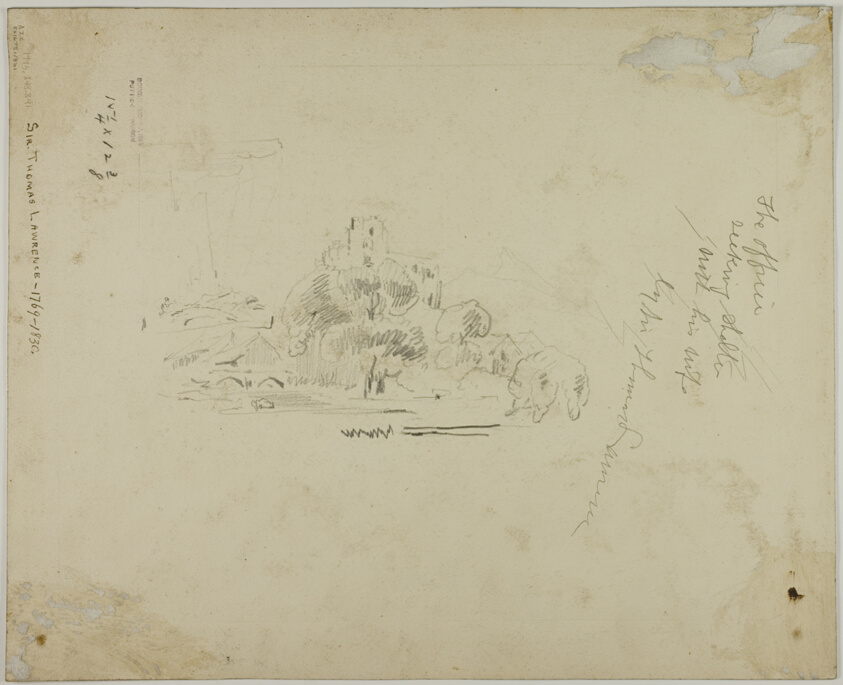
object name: Drawing and Watercolor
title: Officer Seeking Shelter with his Wife and Children from a Storm (recto); Sketch of Castle on Hill (verso)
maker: After Richard Westall; English, 1765-1836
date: c. 1800/20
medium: Pen and brown ink with brush and brown wash and watercolor, scraped to create highlights, heightened with gum varnish (recto), and graphite (verso), on cream wove card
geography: England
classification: watercolor; drawings (visual works); prints and drawing